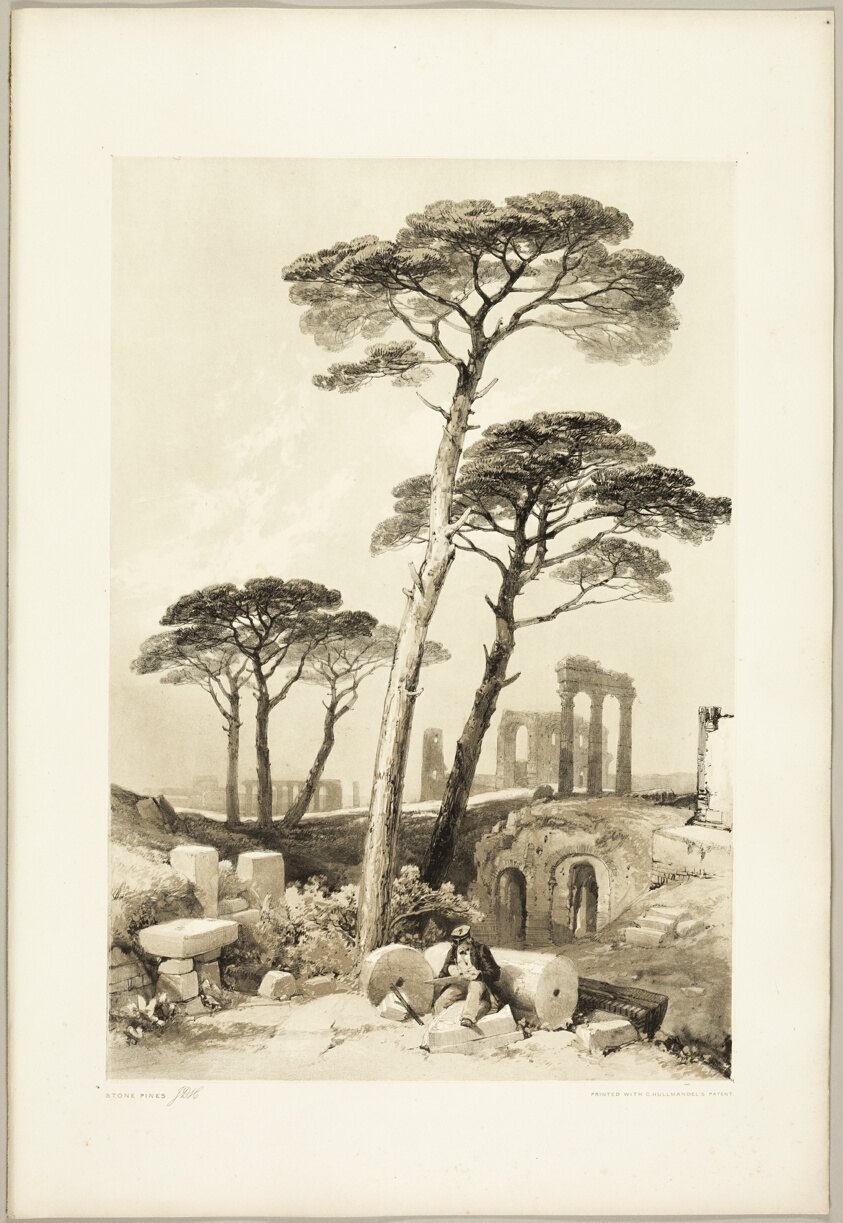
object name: Print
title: Stone Pines, from The Park and the Forest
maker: James Duffield Harding (English, 1798-1863); printed by Charles Joseph Hullmandel (English, 1789–1850); published by Thomas McLean (English, 1788–1875)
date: 1841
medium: Lithograph in black, with brown tint from a second plate, on ivory wove paper, laid down on ivory wove paper (chine collé)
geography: England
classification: lithograph; print; prints and drawing